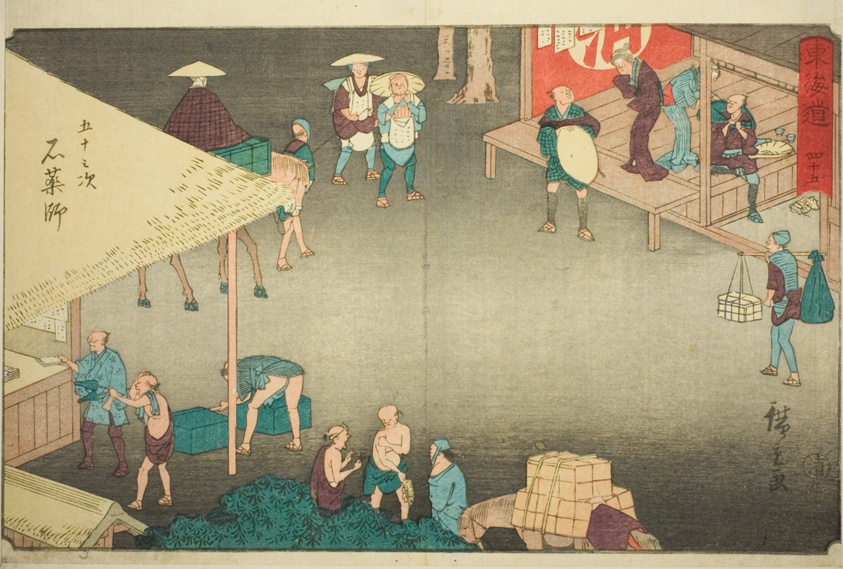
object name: Print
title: Ishiyakushi—No. 45, from the series "Fifty-three Stations of the Tokaido (Tokaido gojusan tsugi)," also known as the Reisho Tokaido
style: Japanese (culture or style)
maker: Utagawa Hiroshige 歌川 広重; Japanese, 1797-1858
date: c. 1847/52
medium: Color woodblcok print; oban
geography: Japan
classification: woodblock print; print; asian art